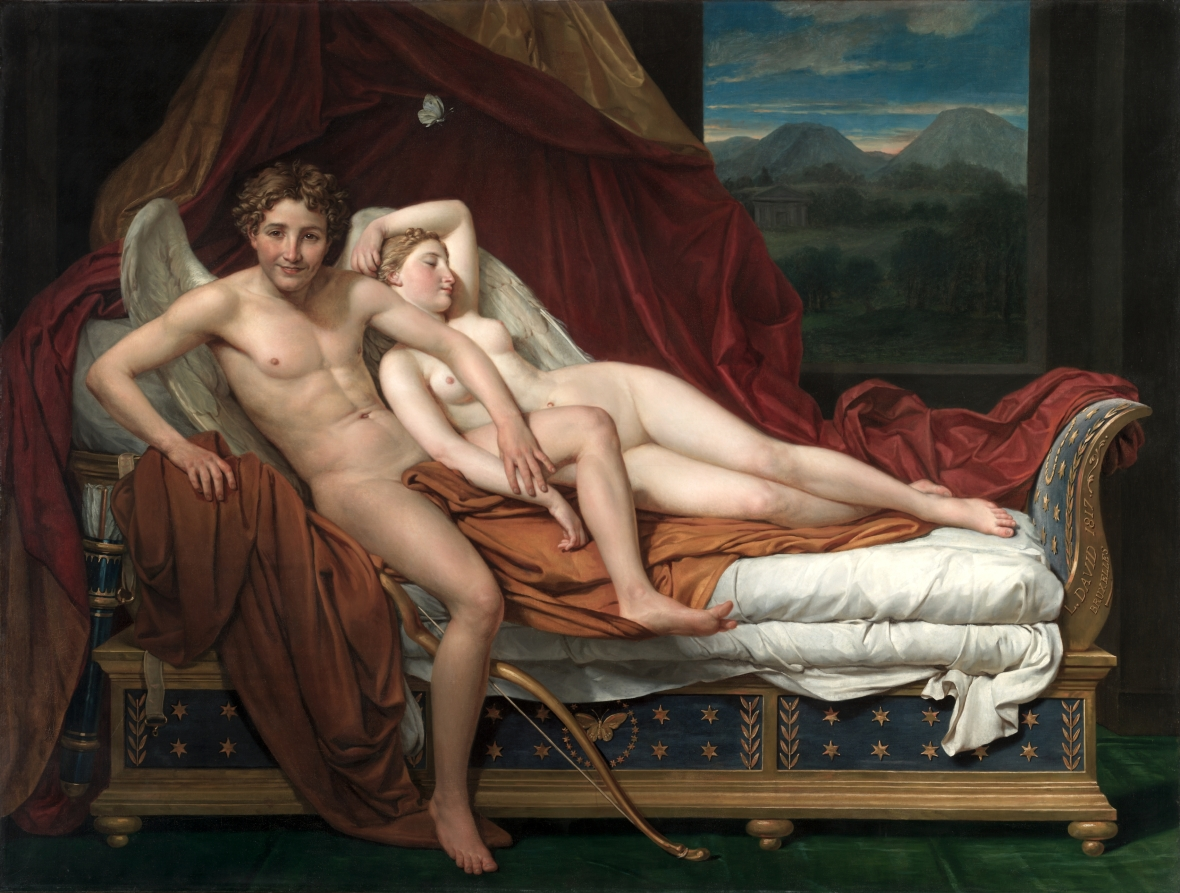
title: Cupid and Psyche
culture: France, 19th century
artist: Jacques-Louis David (French, 1748–1825)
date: 1817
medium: oil on canvas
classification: Painting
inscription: Signed in yellow in arm of the couch: L. David 1817 Bruxelles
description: David used the story of Cupid and Psyche to explore the conflict between idealized love and physical reality. Cupid, lover of the beautiful mortal Psyche, visited her nightly on the condition that she not know his identity. Cupid was usually depicted as an ideal adolescent, but here David presents him as an ungainly teenager smirking at his sexual conquest. David took inspiration from a number of ancient texts, including an obscure, recently published Greek poem by Moschus that describes Cupid as a mean-spirited brat with flashing eyes and curly hair.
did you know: Jacques-Louis David included two butterflies in this painting: one above the slumbering Psyche and the other on the base of the couple's bed frame.